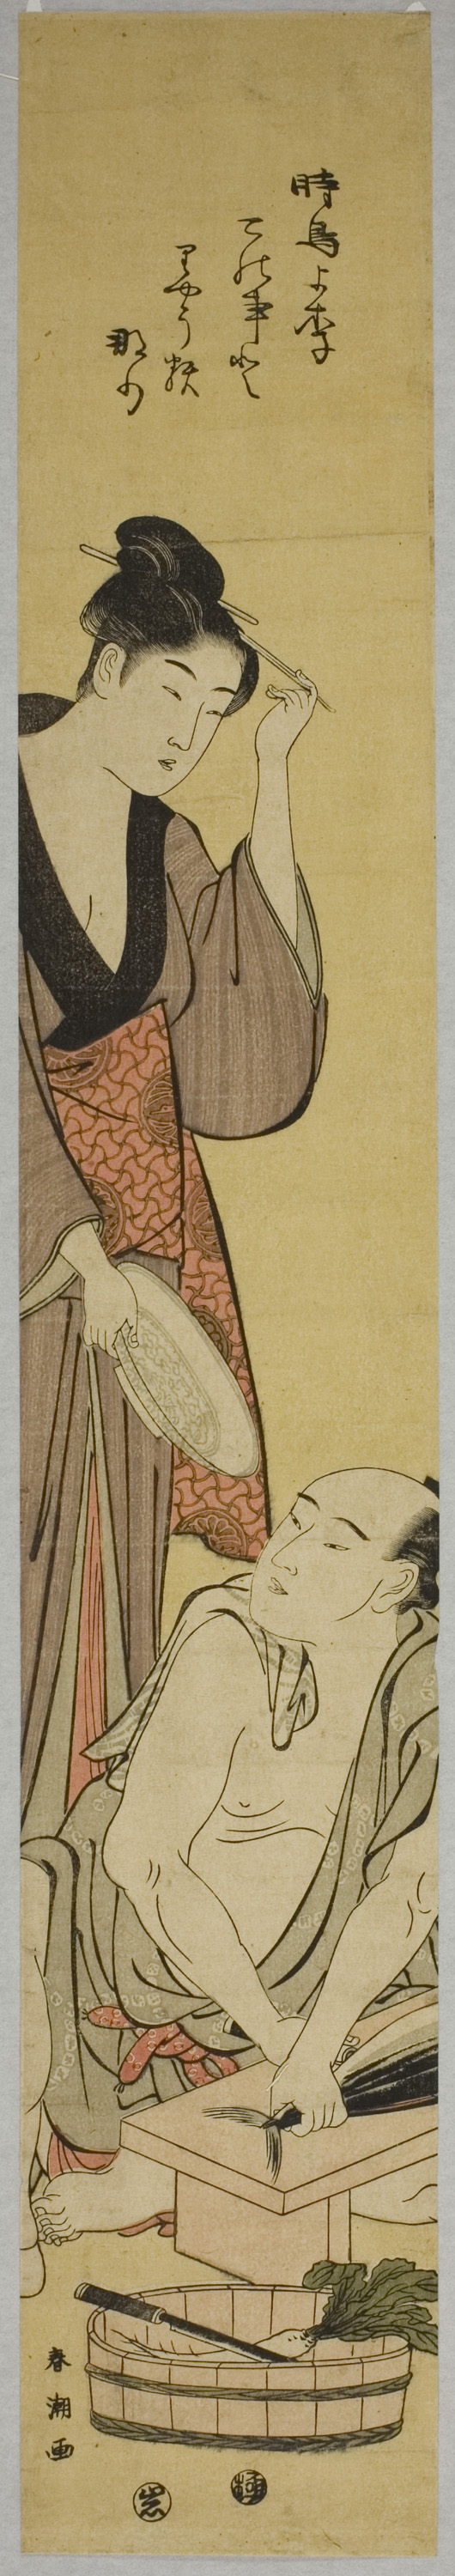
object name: Print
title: Preparing Fish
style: Japanese (culture or style)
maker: Katsukawa Shuncho; Japanese, active c. 1780-1801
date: c. 1780/1801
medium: Color woodblock print; hashira-e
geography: Japan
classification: woodblock print; print; asian art